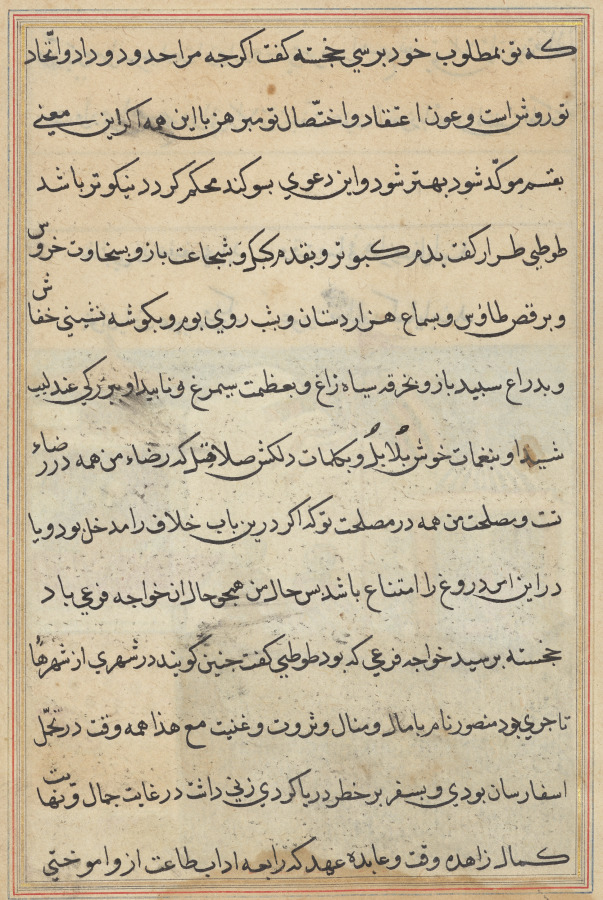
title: Page from Tales of a Parrot (Tuti-nama): text page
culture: Mughal India, court of Akbar (reigned 1556–1605)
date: c. 1560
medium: gum tempera, ink, and gold on paper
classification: Painting